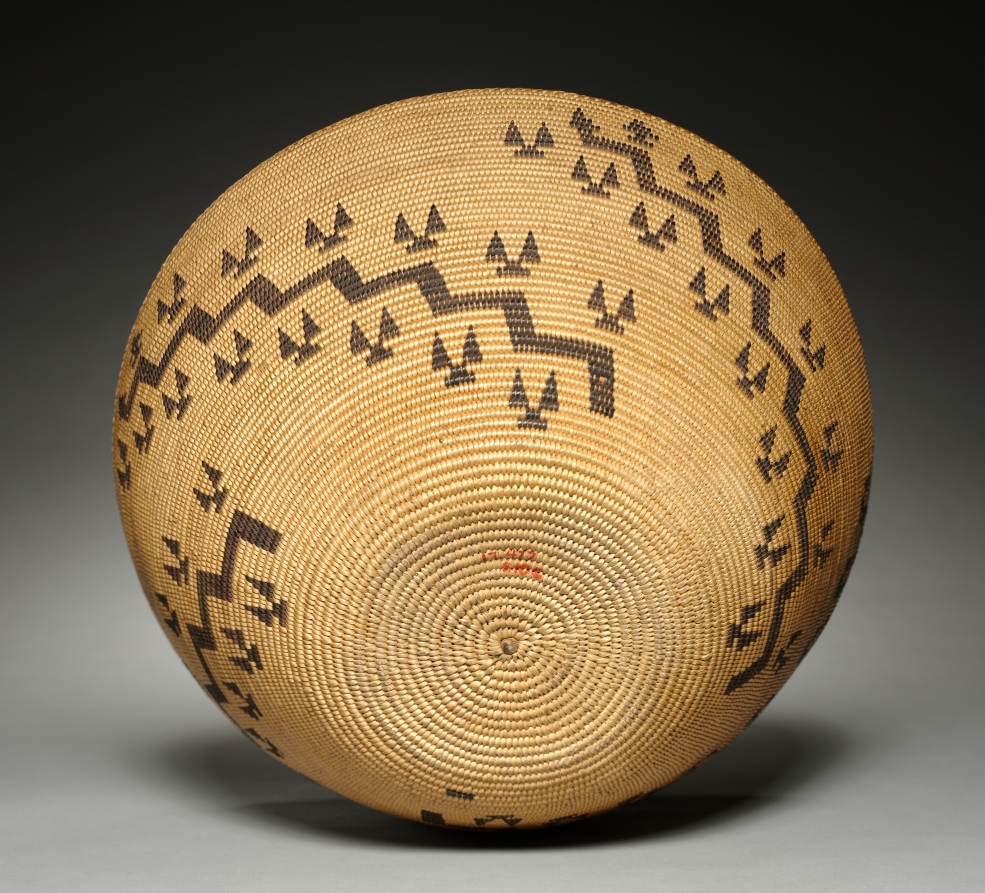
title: Cooking Bowl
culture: California, Mono, Lake Paiute, late 1800s–early 1900s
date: 1890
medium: willow, bracken fern; coiled (3 rods)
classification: Basketry